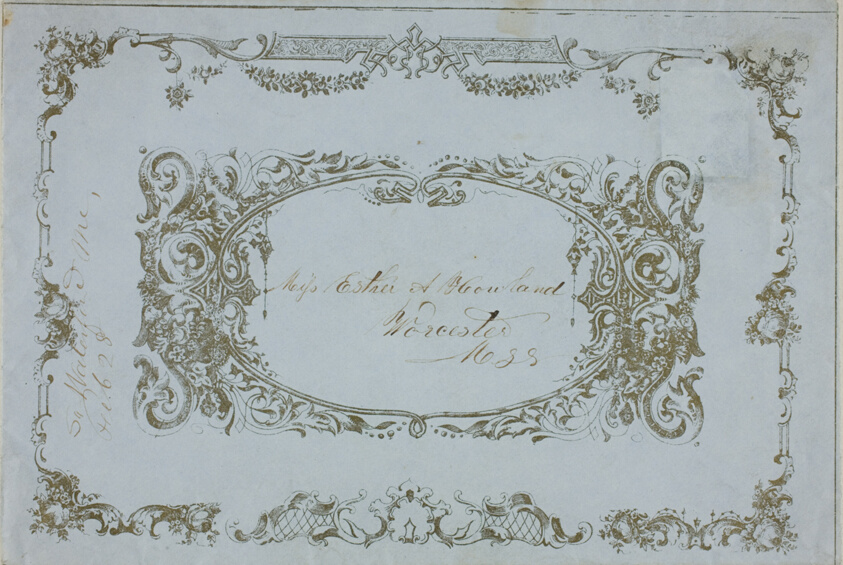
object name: Print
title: Valentine envelope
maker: Unknown Artist; American, 19th century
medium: Lithograph with pen and black ink on blue wove paper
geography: United States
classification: valentine; prints and drawing; print